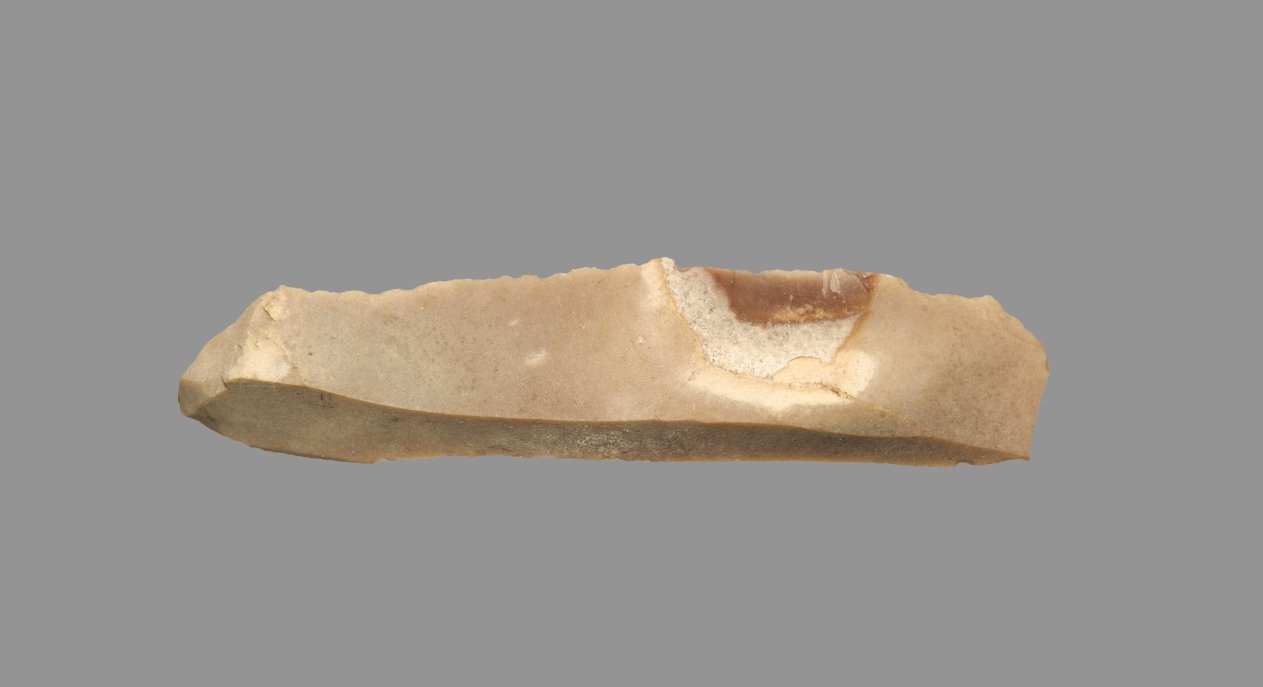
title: Sickle Blade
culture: Egypt, Middle Kingdom (2040–1648 BCE), Dynasty 12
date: 1980–1801 BCE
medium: flint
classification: Implements